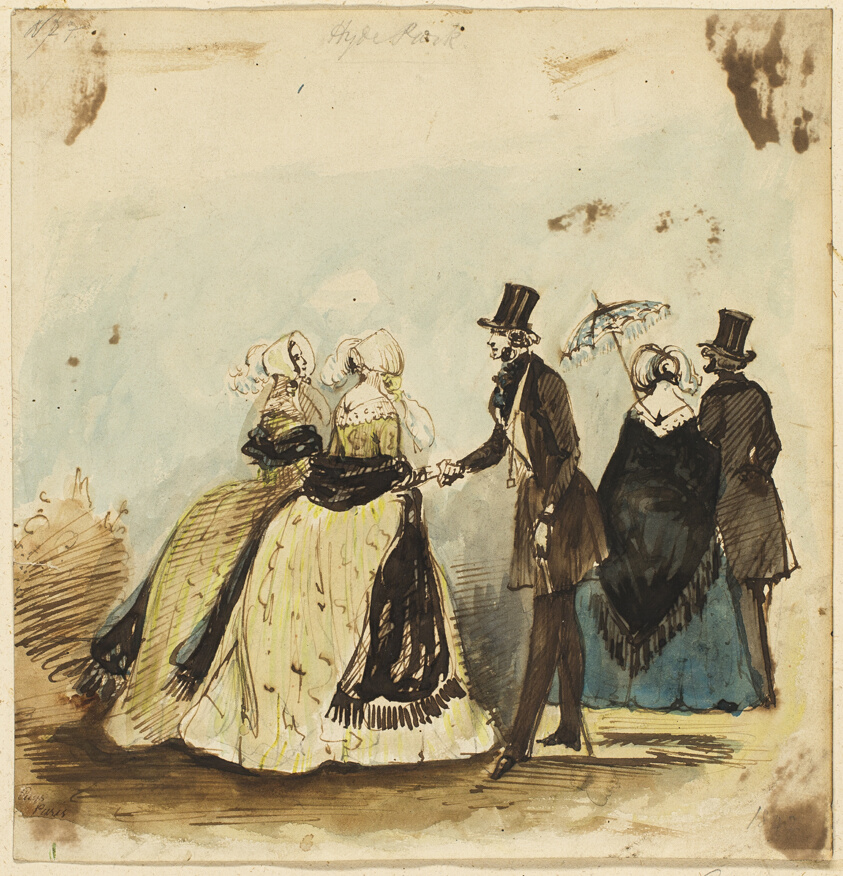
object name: Drawing and Watercolor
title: Hyde Park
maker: Attributed to Constantin Guys; French, 1802-1892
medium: Pen and brown ink, with brush and watercolor, on ivory wove paper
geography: France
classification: pen and ink drawings; drawings (visual works); prints and drawing